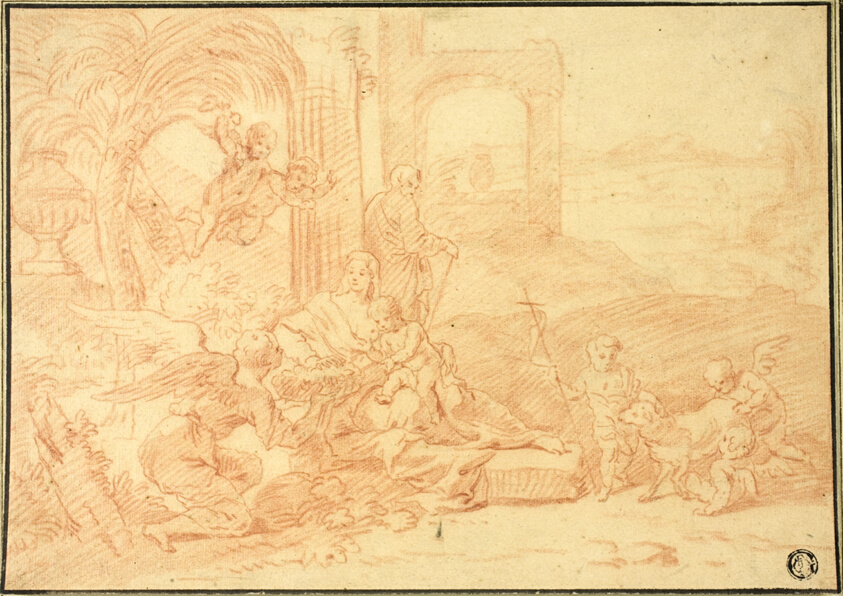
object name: Drawing and Watercolor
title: The Holy Family with Saint John the Baptist and Angels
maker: Possibly Johannes Glauber (Dutch, 1646-1726); or Jacob Jordaens (Flemish, 1593-1678)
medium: Red chalk, over traces of graphite, on buff laid paper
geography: Holland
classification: chalk; drawings (visual works); prints and drawing